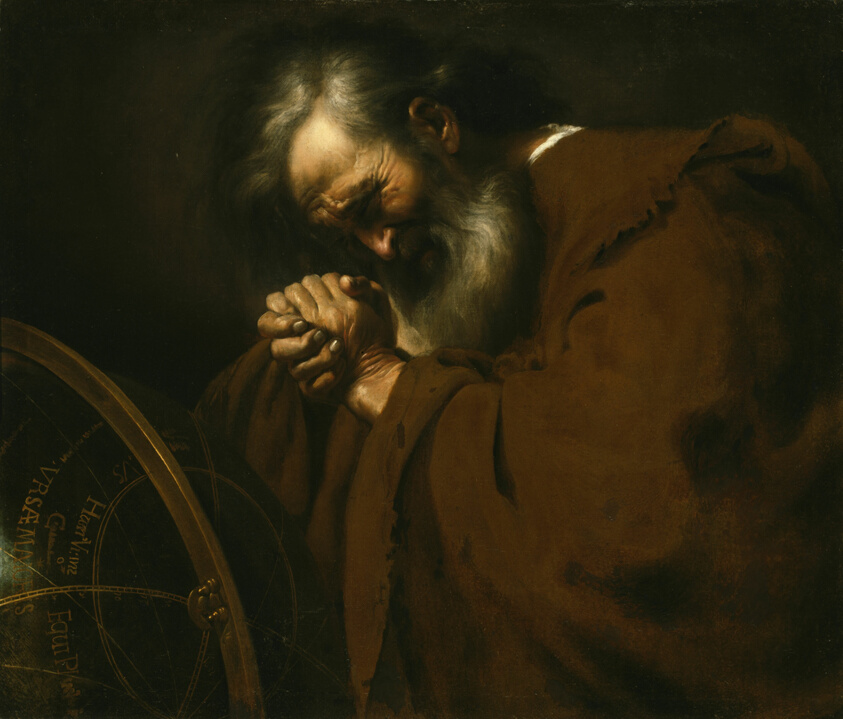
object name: Painting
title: Heraclitus, the Weeping Philosopher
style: 17th Century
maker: Spanish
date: c. 1630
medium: Oil on canvas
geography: Spain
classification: oil on canvas; spanish; paint; oil paintings (visual works); painting; european painting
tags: philosophers, world, prayer, Mourning, man, globes, crying